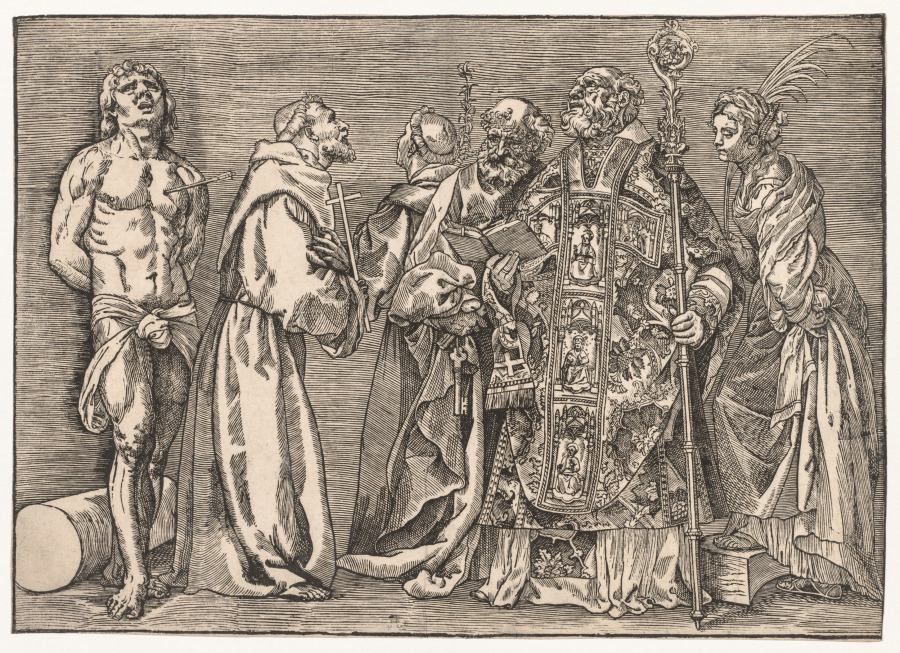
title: The Six Saints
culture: Italy, Venice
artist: Niccolo Boldrini (Italian, c. 1500–after 1566)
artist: after Titian (Italian, c. 1488–1576)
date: c. 1535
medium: woodcut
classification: Print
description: At first, Titian utilized woodcut as a medium of direct expression. He most probably drew directly on the blocks for The Submersion of Pharaoh's Army in the Red Sea and prepared several drawings for each landscape print, carefully perfecting the compositions. After 1530, however, Titian no longer created new designs expressly for graphic reproduction. Rather, prints were a means of circulating pictorial ideals conceived for and executed initially in painting. The Six Saints records, in reverse, the group of saints—Sebastian, Francis, Anthony of Padua, Peter, Nicholas, and Catherine—standing below the vision of the Madonna and Child in Titian's altarpiece for the Venetian church of Saint Nicolo ai Frari. Because the print reproduces only the lower section of the picture, the monumentality of the original conception is diminished, but an image of greater intimacy is gained. Here, Titian changed the figure of Sebastian, whose pose in the original is ungainly. In the print, Sebastian's body is more clearly articulated and, looking heavenward, his face is filled with a stoic pathos.